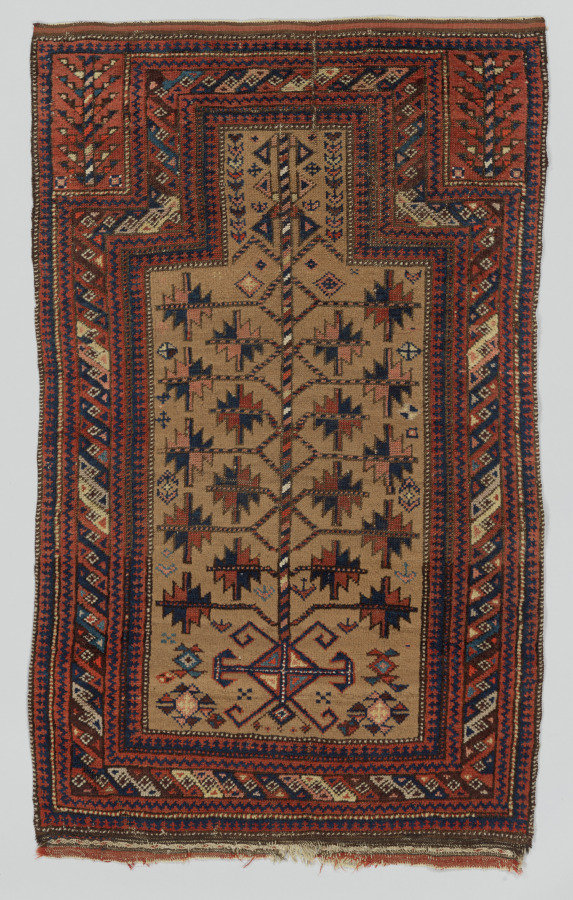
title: Carpet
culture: Iran, Vicinity of Mashhad (Baluchistan), 20th century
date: 1900s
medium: senna knot: wool, cotton, and camel hair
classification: Carpet